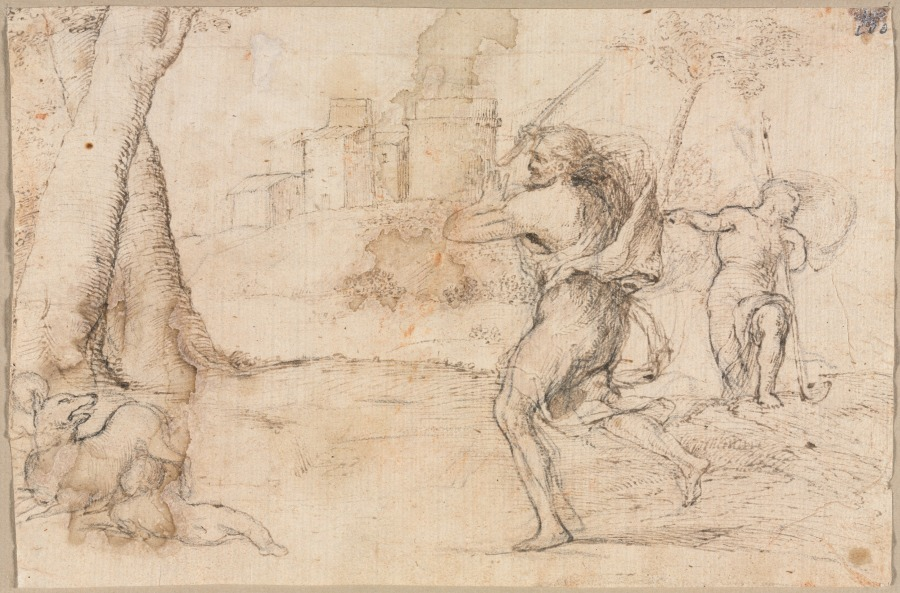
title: Romulus and Remus Found by Faustulus (recto) Concentric Circles (verso)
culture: Italy, 16th century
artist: Romanino (Italian, 1484/87–1562)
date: c. 1535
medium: pen and brown ink, with point of brush and brown wash over black chalk (traces of red chalk and purple wash unrelated to composition)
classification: Drawing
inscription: upper right, in black ink: [2?]00